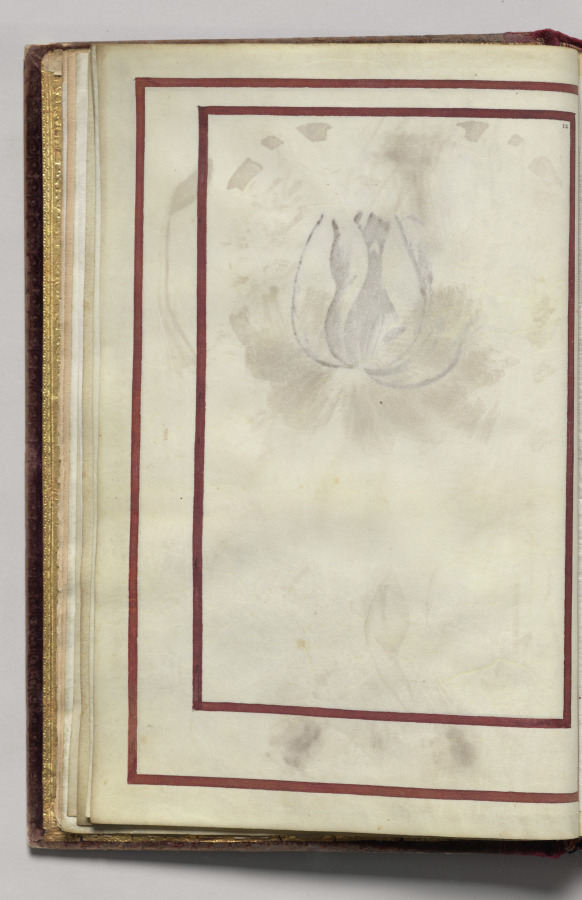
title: Border, folio 6 (verso), from Florilegium (A Book of Flower Studies)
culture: France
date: 1608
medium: watercolor, ink, silver and gold over occasional traces of pencil, on vellum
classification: Bound Volume